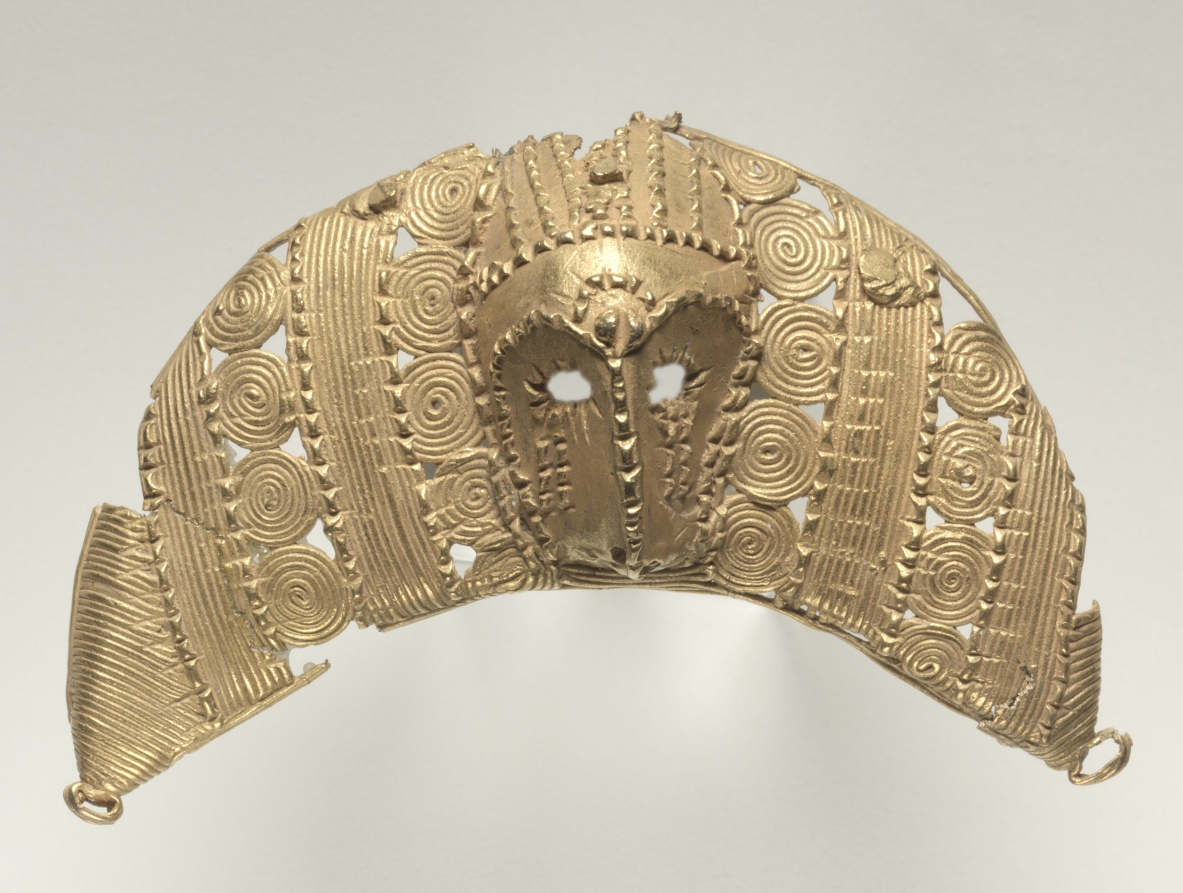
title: Pendant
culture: Africa, West Africa, Côte d'Ivoire, probably Baule-style goldsmith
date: 1900s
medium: Gold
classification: Jewelry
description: Gold objects, always cast using the lost-wax method, are the only Baule art forms associated with ancestor spirits. Usually hidden in pots or suitcases, gold adornments are displayed on important occasions such as funerals. They are laid out around the corpse before burial. A widow will wear them on a chain around her neck or attached to her hair at the ceremony signaling the end of mourning.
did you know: The crescent-shaped scarification on the forehead of this piece is called ngwa, or “moon.”